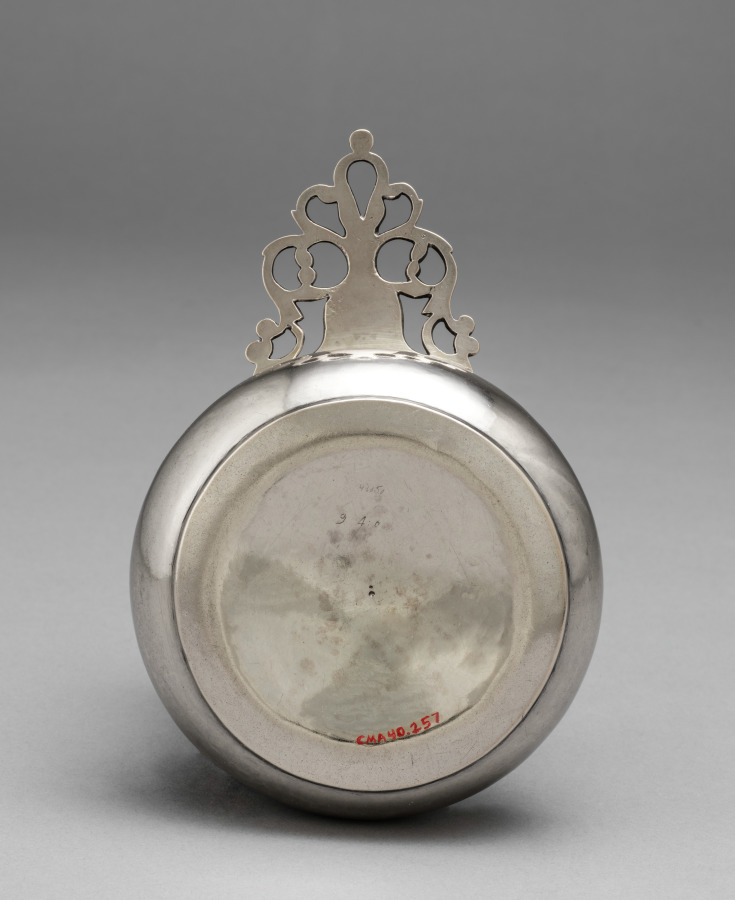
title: Porringer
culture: America, Massachusetts, Ipswich, 18th century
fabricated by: Daniel Rogers (American, 1735–1816)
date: c. 1760–1780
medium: silver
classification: Silver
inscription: engraved "K" over "E * S" in shaded block letters on top of handle. Scratched on bottom: "9 4 : 0."